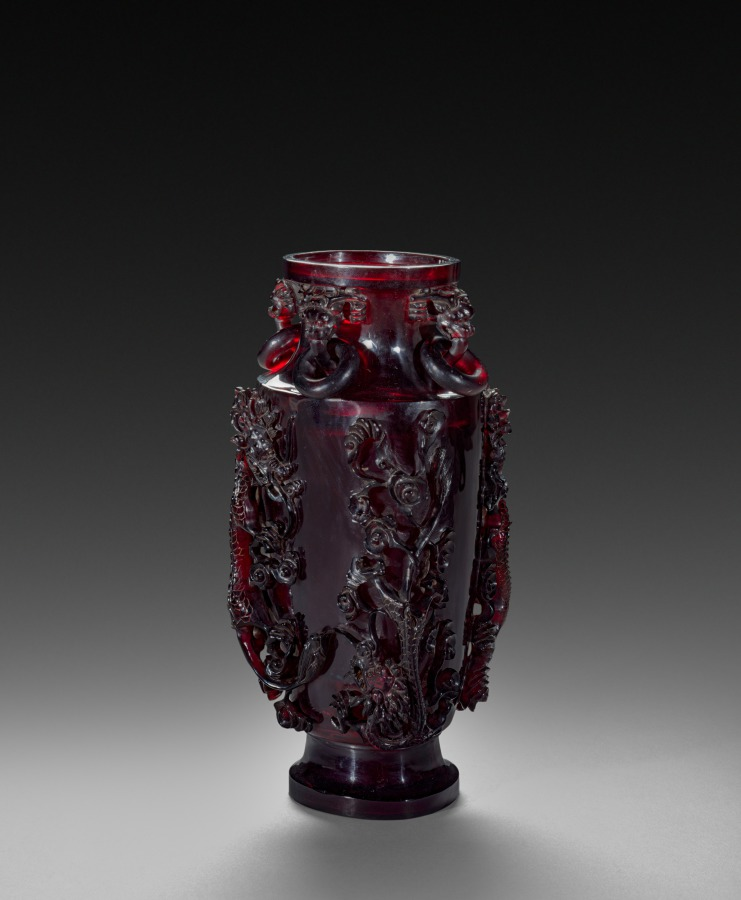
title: Vase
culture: China, Qing dynasty (1644–1911), Qianlong reign (1736–95)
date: 1736–95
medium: carved red amber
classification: Stone